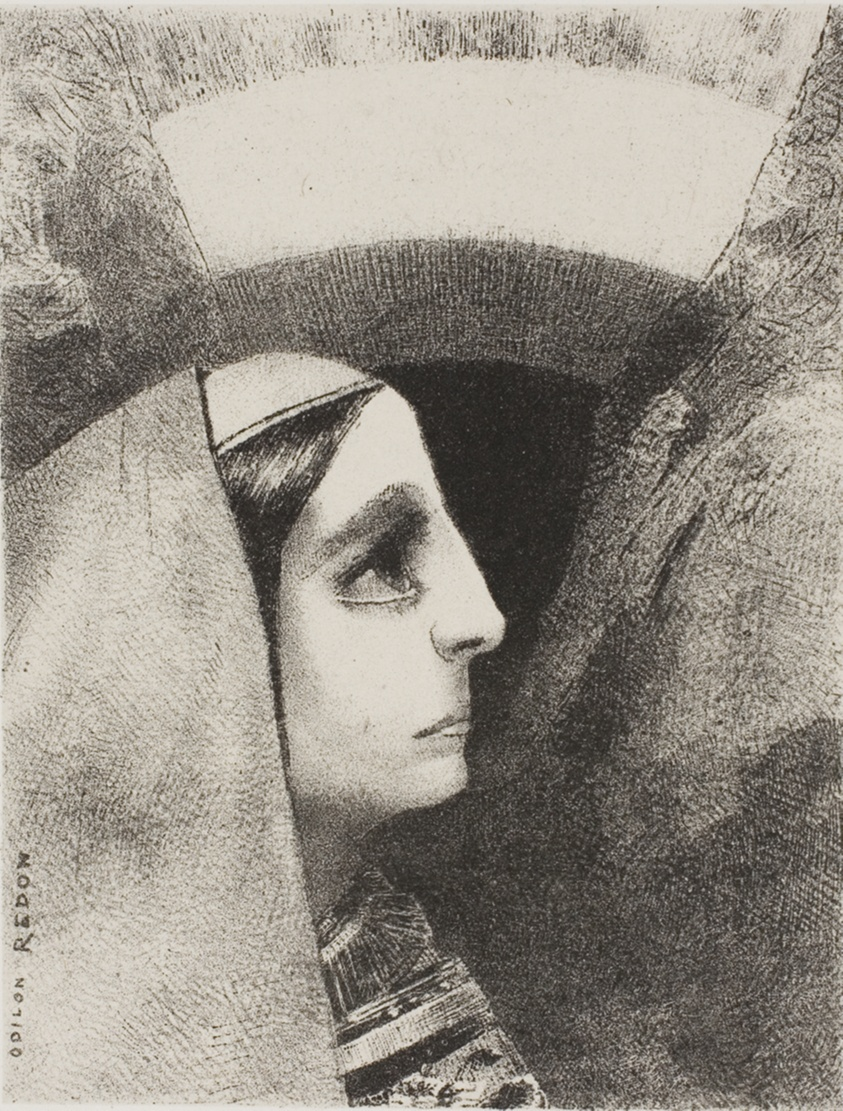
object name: Print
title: Before the Black Sun of Melancholy, Lenore Appears, plate two from To Edgar Poe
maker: Odilon Redon (French, 1840-1916)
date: 1882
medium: Lithograph in black on ivory China paper, laid down on white wove paper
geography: France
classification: lithograph; print; prints and drawing; paper